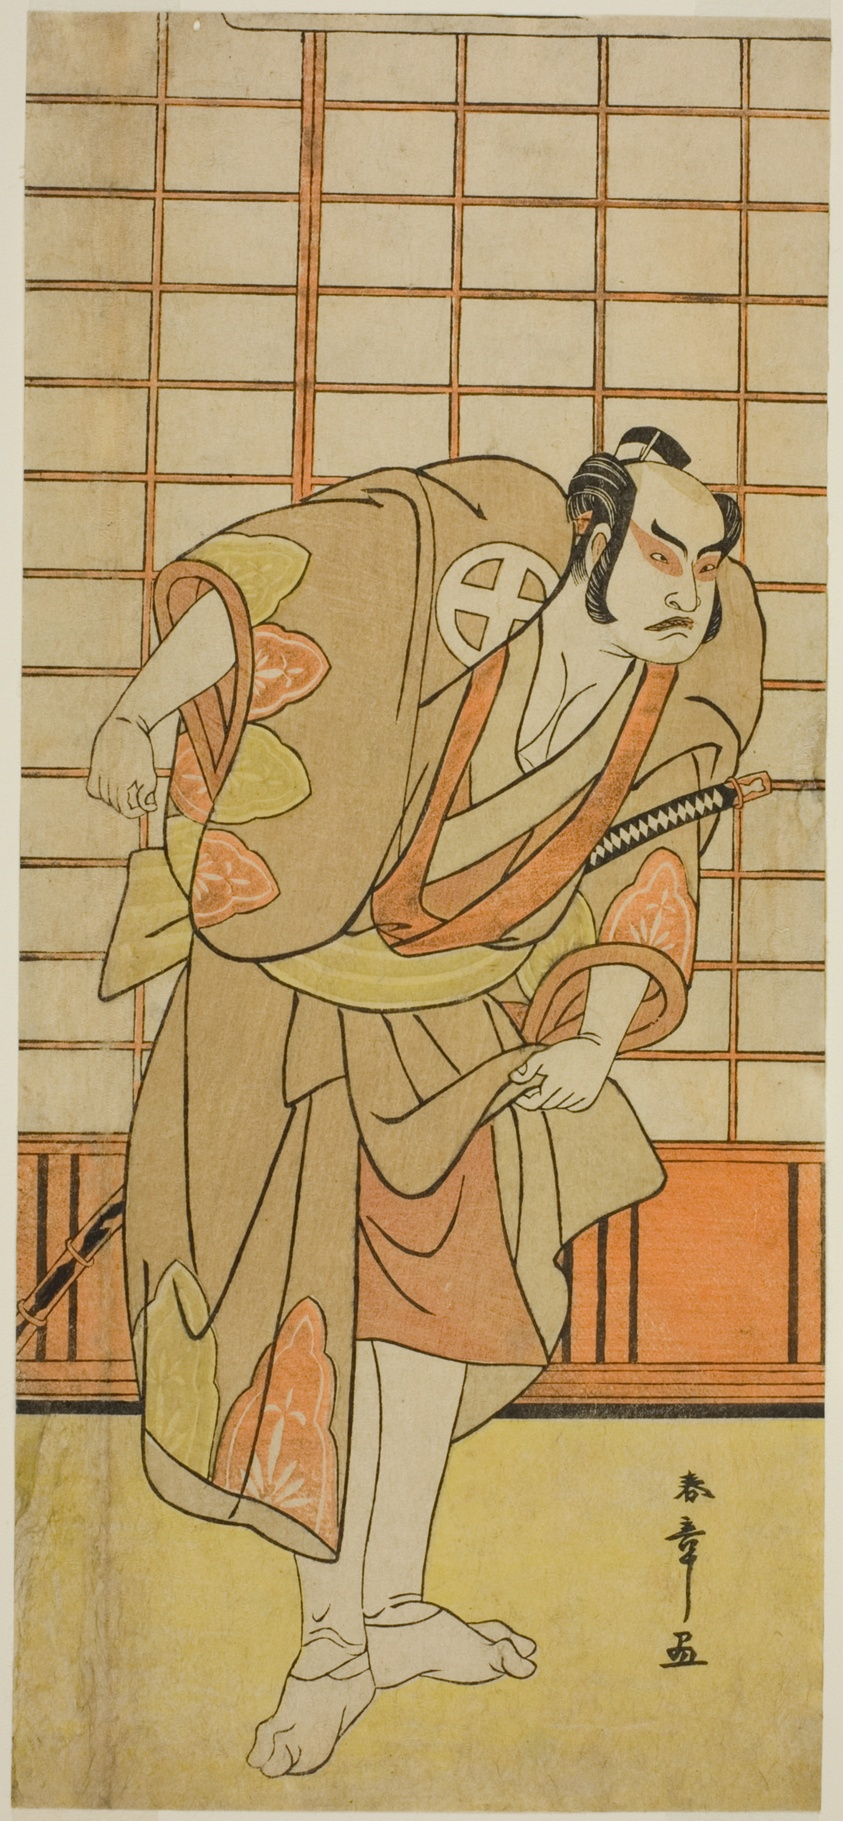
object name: Print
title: The Actor Otani Hiroji III as Hata no Daizen Taketora Disguised as Shikishima Wakahei in the Play Juni-hitoe Komachi-zakura, Performed at the Kiri Theater in the Eleventh Month, 1784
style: Japanese (culture or style)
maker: Katsukawa Shunsho 勝川 春章; Japanese, 1726-1792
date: c. 1784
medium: Color woodblock print; hosoban; from a multisheet composition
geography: Japan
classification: woodblock print; print; asian art